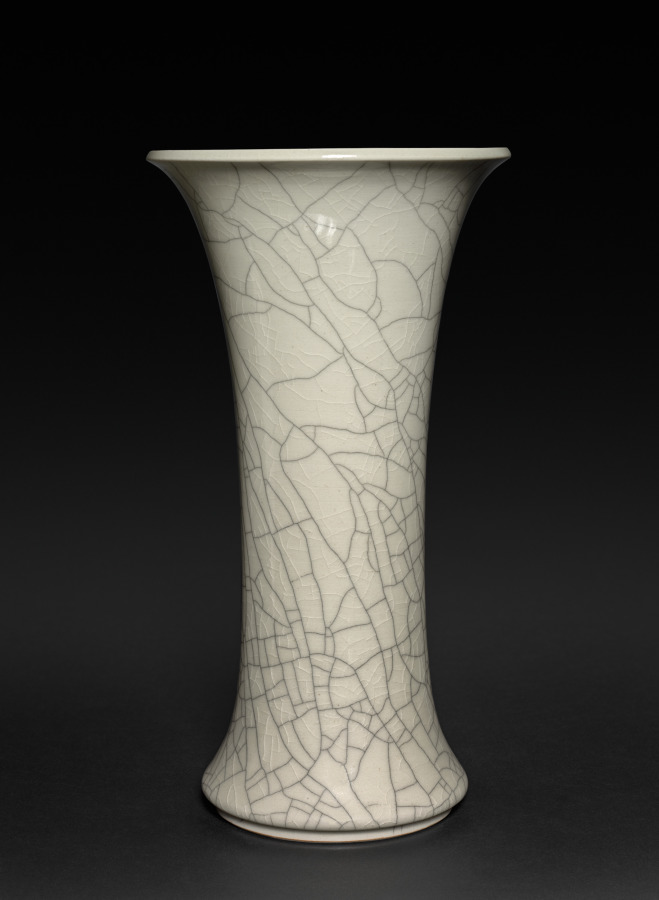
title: Gu-shaped Vase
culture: Japan, Meiji period (1868–1912)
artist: Seifū Yohei III (Japanese, 1851–1914)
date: 1912–14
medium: Porcelain with crackled glaze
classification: Ceramic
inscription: 清風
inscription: 清風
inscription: 帝室技芸員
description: Seifū Yohei III mined the repertoire of Chinese vessel types, from ceramics modeled after ancient ritual bronzes to shapes developed in the Yuan (1279–1368) and Ming (1368–1644) dynasties. His designs tended to be formal and restrained, often featuring creamy white glazes suggestive of the hue of Ding ware and green glazes resembling Longquan ware. This gu-shaped vase has a cracked-ice glaze, which was once customarily called Ge (Japanese pronunciation Ka), after the kiln where it purportedly originated during the Southern Song dynasty (1127–1279). The glaze’s double-crackle pattern, featuring both deeper and shallower cracks, is called “gold threads and iron lines.” The effect was enhanced here by coating the vessel with ink or another stain, which was allowed to seep into the cracks before the surface was wiped clean.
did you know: Gu-shaped vases are relatively slender cylinders that flare at both the mouth and foot with orbs or drumlike forms partway up the vessel.